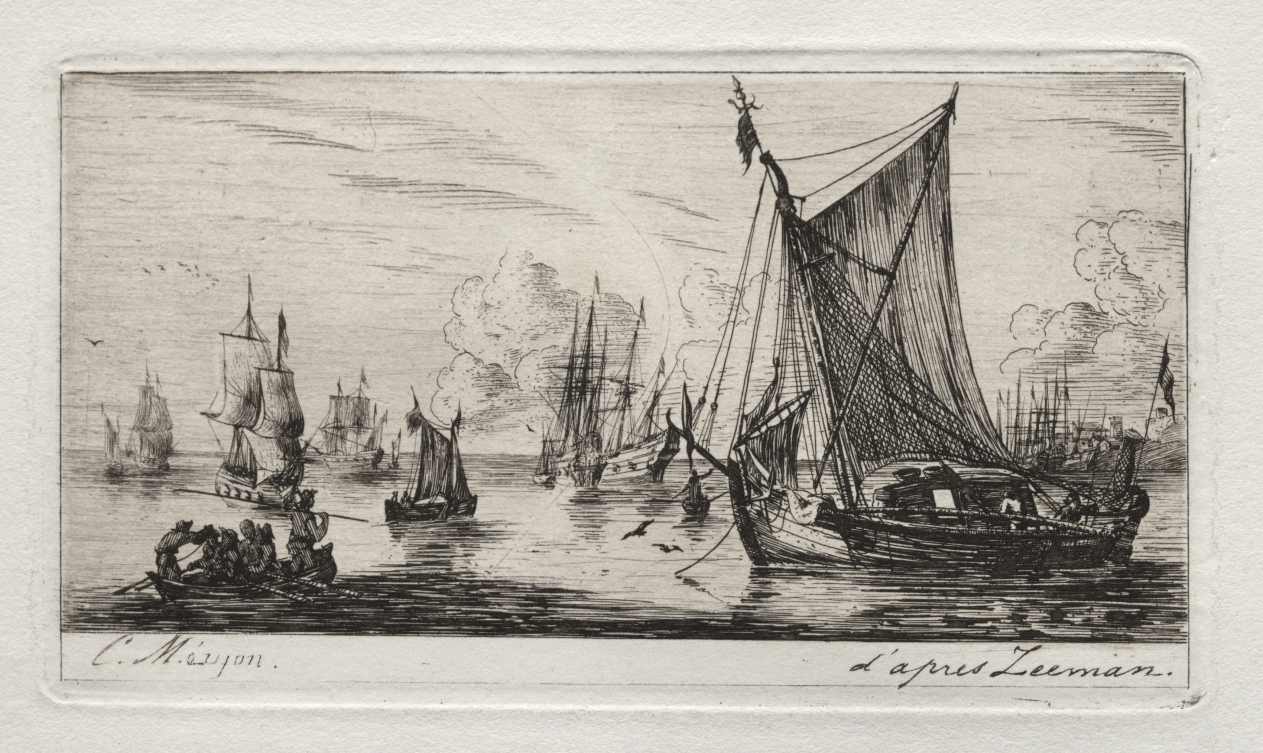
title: South Sea Fishers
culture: France, 19th century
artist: Charles Meryon (French, 1821–1868)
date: 1850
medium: etching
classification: Print